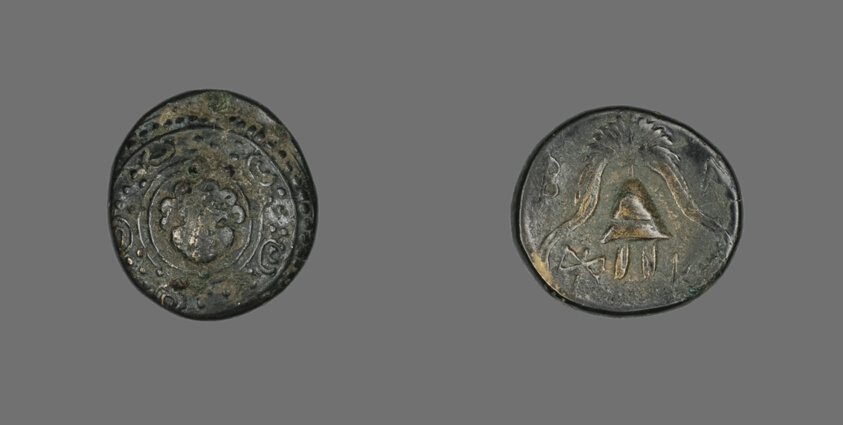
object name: Coin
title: Coin Depicting a Shield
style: greek, ancient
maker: Greek, minted in Antigonus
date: 277-220 BCE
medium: Bronze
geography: Ancient Greece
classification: coin; ancient art